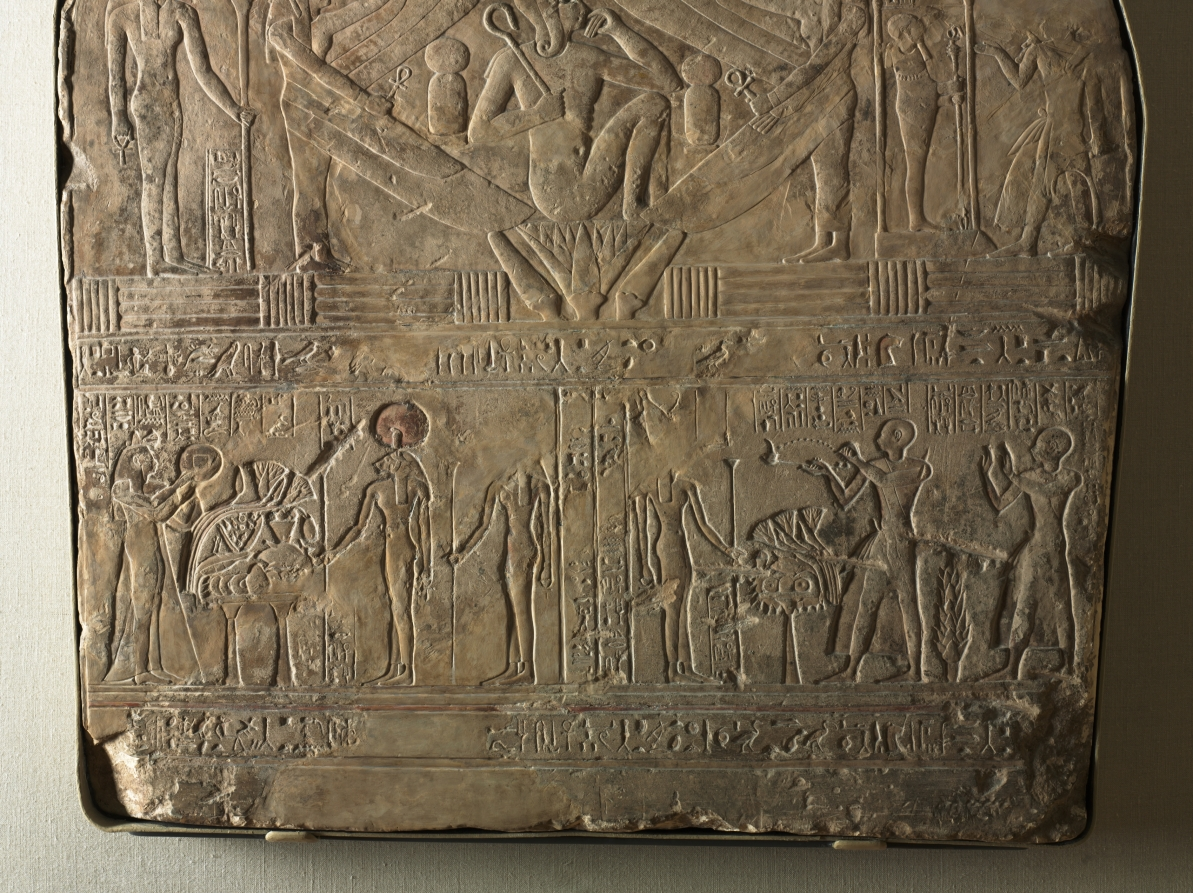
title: Stele of the High Priest of Ptah, Shedsunefertem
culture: Egypt, Third Intermediate (1069–715 BCE), Dynasty 22, reign of Shosheng I (943–922 BCE)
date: 945–924 BCE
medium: limestone, originally painted and gilded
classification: Sculpture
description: This stele of Shedsunefertem, the High Priest of Ptah, is rich in religious symbolism. In the center of the top register is a disk and crescent, originally gilded. At either side a baboon raises its arms in adoration. The Egyptians believed that the jabbering of the baboons at dawn was a hymn of praise to the sun god Ra in a secret language only the king understood. It begins, "Praising Ra when he shines on the horizon." Directly below in the middle register a child god is seated on a lotus flower. In Egyptian mythology the sun arose out of the primeval waters at the dawn of creation in a lotus flower. Winged figures of Maat, goddess of Truth, stand protectively at either side. The damaged figure of the high priest himself, wearing the panther skin and jackal-collar of his office, appears at the far right, worshipping the god Ptah, whose consort, the lioness-headed goddess Sekhmet, appears on the far left. The figures in the bottom register are colleagues who appear here as dependents under the powerful high priest's protection.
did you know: The eye and eyebrow of the young sun-god Ra (at center) were once inlaid.